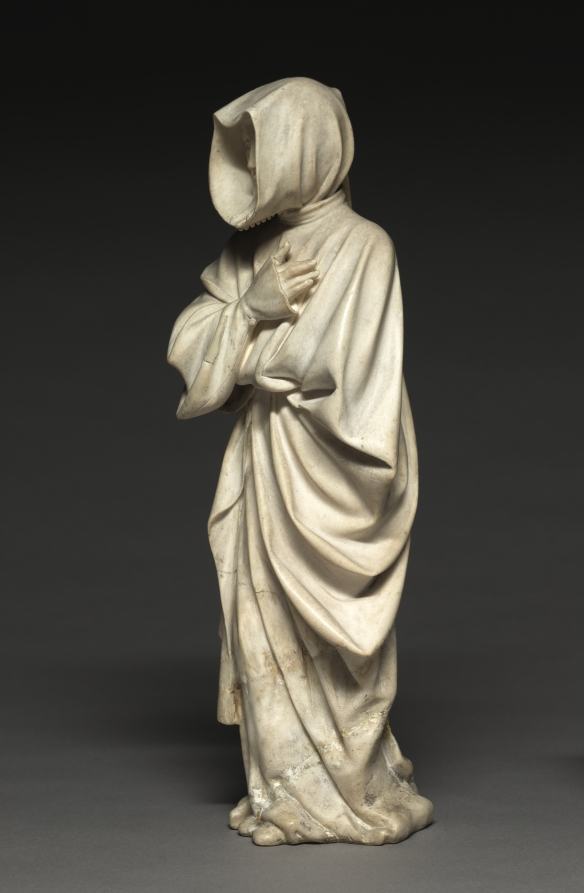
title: Mourner from the Tomb of Philip the Bold, Duke of Burgundy (1364–1404)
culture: Netherlands, active Dijon, 15th century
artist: Claus de Werve (Netherlandish, 1380–1439)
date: 1404–10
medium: vizille alabaster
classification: Sculpture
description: This figure comes from the tomb of Duke Philip the Bold from the church of Champmol near Dijon (Burgundy, France). Philip, who founded the monastery and designated it as his burial place, hired the best artists, many of whom came from the Netherlands. While the commission was given in 1381, the work was not completed until 1410, six years after the duke’s death. This mourner is unusual for the time because it is not carved as a static low relief on the pedestal of the tomb but interacts with the viewers and their fellow procession members. The lifelike quality of the figure is due in large part to the alabaster. Its softness allowed artists to carve details into the material, and the transparent, milky white stone could also be polished to a high gloss.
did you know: A plaster cast of this mourner decorates the empty niche in the Tomb of Philip the Bold in Dijon, France.